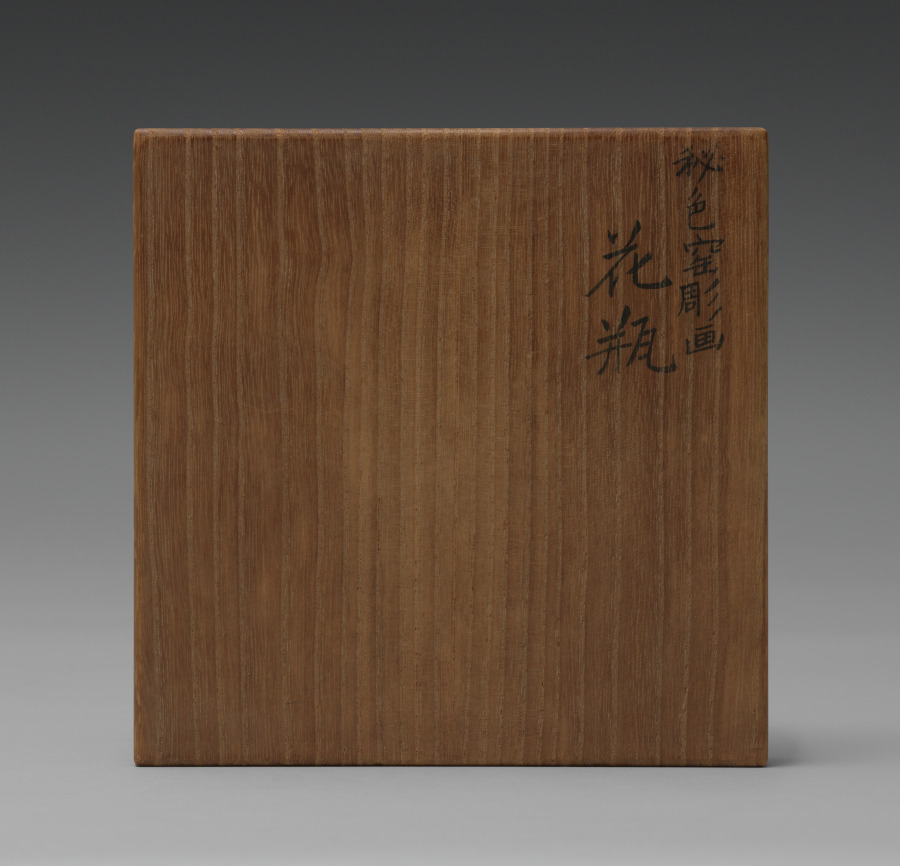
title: Flower Vase with Butterflies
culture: Japan, Meiji period (1868–1912)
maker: Seifū Yohei III (Japanese, 1851–1914)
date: 1907–14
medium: Porcelain with green glaze and carved and molded design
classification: Ceramic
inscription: 清風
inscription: 【印】 帝室技芸員。 【印】 清風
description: This flower vase has two pairs of butterflies forming low-relief roundels, one on each side. The butterflies face each other, one positioned above and the other below, their antennae curling up to a centrally placed floral motif. In the spaces between the pairs of insects, additional raised floral designs are set within vinelike extensions reminiscent of open metalwork banners and canopy adornments in Buddhist temples. The lip and the foot of the vase remain white, and the thinning of the green glaze within the higher-relief portions of the body decoration accentuates the designs. This work, like the sweets bowl CMA 2022.232, has a box lid attribution to Yohei III by Yohei IV. His inscription is dated to the autumn of 1919.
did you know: The box identifies the vase as in the hisokuyō (Chinese mise yao 秘色窯), or “mysterious color ware,” style.